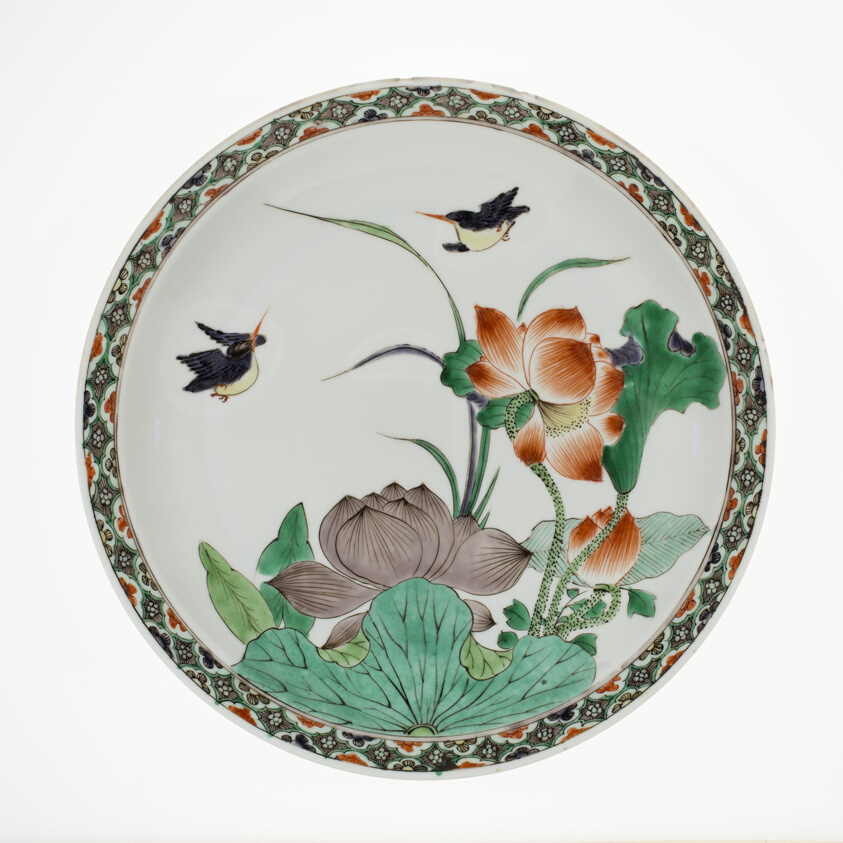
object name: Vessel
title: Plate with Lotus Blossoms and Kingfisher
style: Chinese (culture or style)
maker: China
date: Qing dynasty (1644–1911), Kangxi period (1662–1722)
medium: Porcelain painted with overglaze famille verte enamels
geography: China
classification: plate (general, dish); porcelain; dish (vessel); asian art; ceramics; vessel